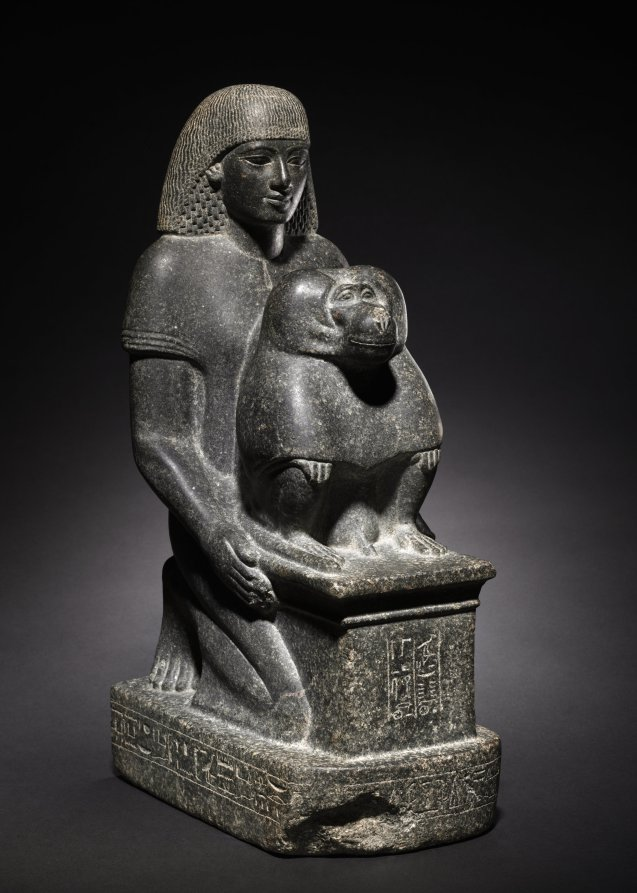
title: Statue of Minemheb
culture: Egypt, New Kingdom (1540–1069 BCE), Dynasty 18, reign of Amenhotep III (1390–1352 BCE)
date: c. 1391–1353 BCE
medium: granodiorite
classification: Sculpture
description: Minemheb was one of the many court officials who helped prepare for Amenhotep III's 30-year jubilee festival. Clearly, Minemheb regarded this as the high point of his career, since his title as chief of construction for the jubilee temple is the primary one provided on this statue. It is actually a statue within a statue: Minemheb kneels to present a small altar, upon which squats a statue of the god Thoth in baboon form. Carved in extremely hard stone, Minemheb's statue is nonetheless carefully detailed and superbly modeled. Special attention was given to the rendering of the baboon's face. The heavy-lidded eyes and furrowed brow give the animal an almost contemplative expression.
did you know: The baboon in this sculpture is the god Thoth in one of his animal forms.